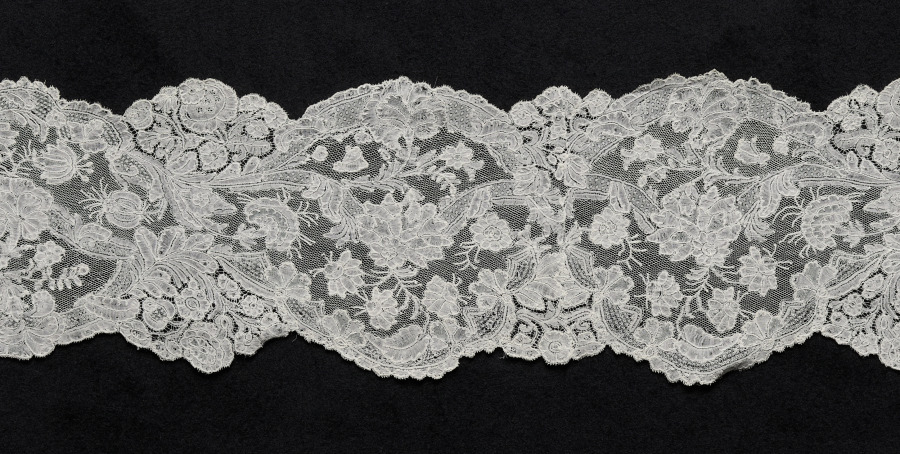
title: Lace Lappet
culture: Belgium, Brussels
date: 1700s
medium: Linen: bobbin lace (Point d'Angleterre)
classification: Lace